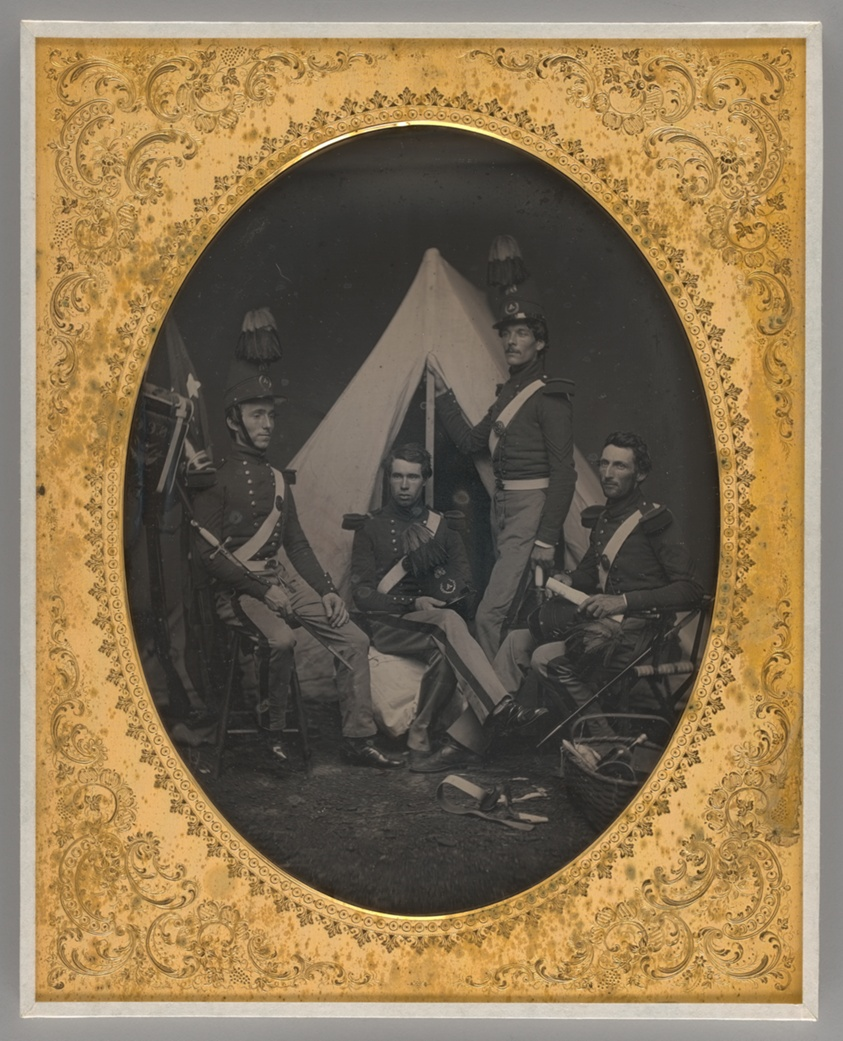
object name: Photograph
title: Untitled (New York Militiamen)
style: 19th century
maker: Unknown maker; American, 19th century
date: 1855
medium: Daguerreotype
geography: United States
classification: portrait; photograph; photographic process; photography; portrait; daguerreotype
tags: lundberg collection, portraits, Male, military, portraits: male subject, portraits: multiple subjects